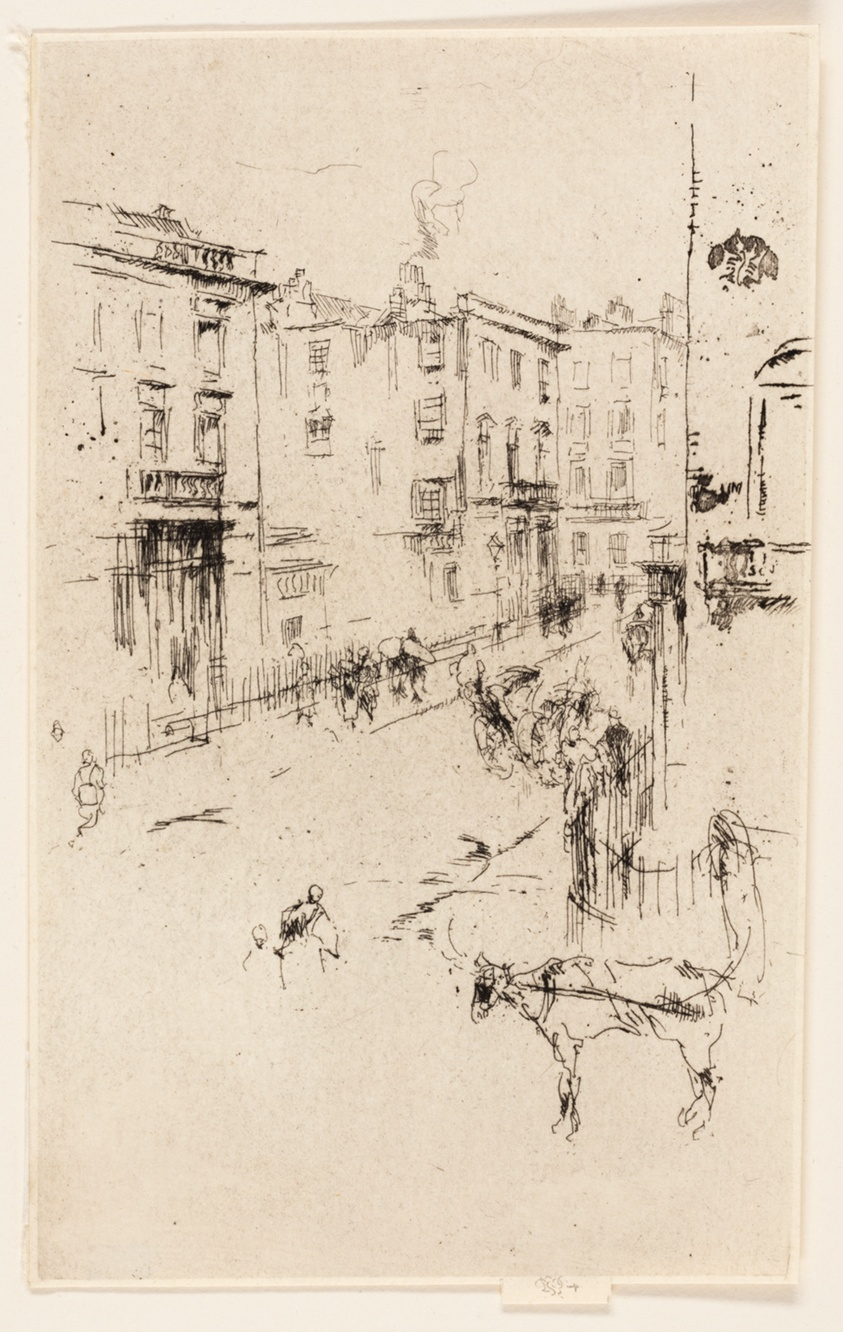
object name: Print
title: Alderney Street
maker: James McNeill Whistler (American, 1834-1903)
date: 1881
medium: Etching with foul biting in black ink on ivory laid paper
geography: United States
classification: etching; foul biting; print; prints and drawing; paper